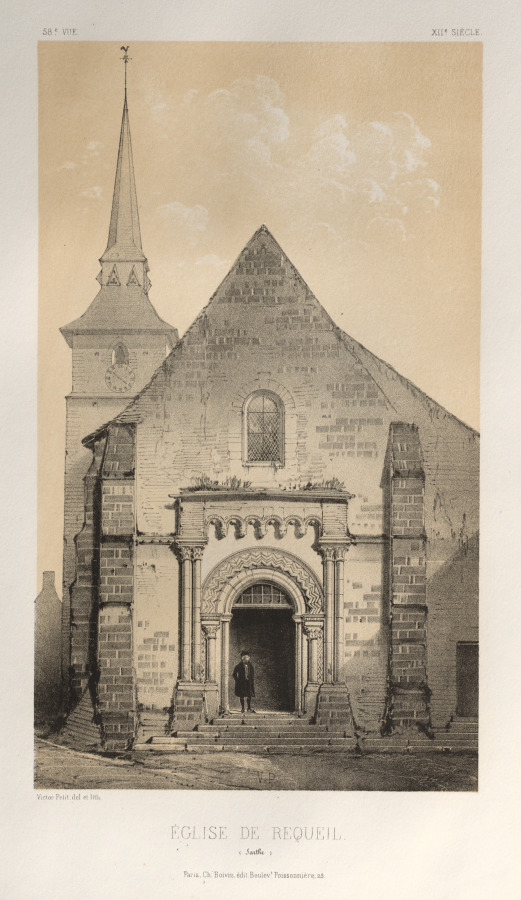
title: Architecture Pittoresque ou Monuments des XVeme. Et XVIeme. Siecles: Chateaux de France des XV et XVI Siecles: Pl. 58, Église De Requeil (Sarthe)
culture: France, 19th century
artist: Victor Petit (French, 1817–1874)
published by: Charles Boivin (publisher and editor); Lith de Godard a Paris (printer)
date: 1860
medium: lithograph with tint stone, from portfolio of 100 lithographs with tint stone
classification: Print